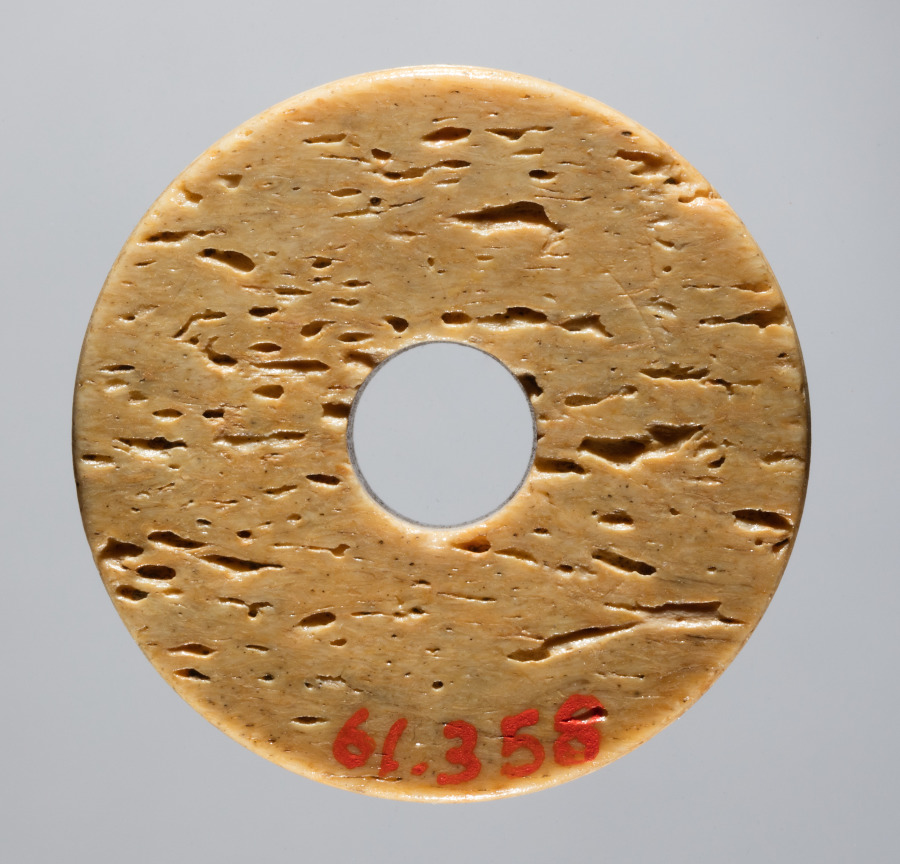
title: Spindle Whorl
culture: Iran, early Islamic period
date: 700s - 900s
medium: bone, incised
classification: Spindle Whorl